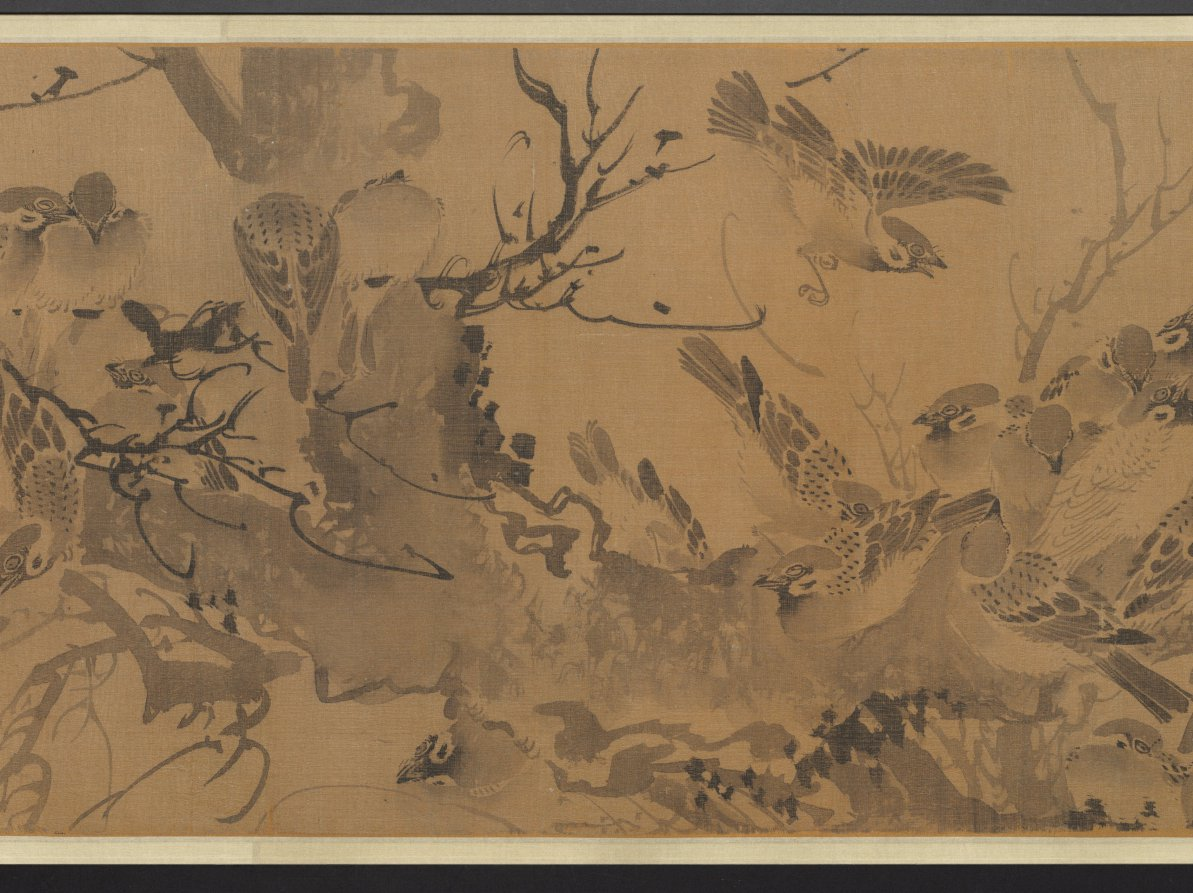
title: A Hundred Sparrows in a Lofty Grove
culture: China, Ming dynasty (1368–1644)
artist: attributed to Lin Liang (Chinese, 1416–1480)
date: 1368–1644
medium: handscroll; ink on silk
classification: Painting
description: Sparrows engaged in all kinds of activities frolic amid leafy branches, blades of grass, rocks, and a waterfall. As our eyes move over the scroll, the artist engages us in enjoying the sparrows’ carefree movements in a natural setting. The charming birds were painted from close observation in swift and fluent brushstrokes. Sparrows are a common bird and in Chinese painting they often represent the commoner in human society as opposed to the noble pheasant or peacock representative of the ruling class.